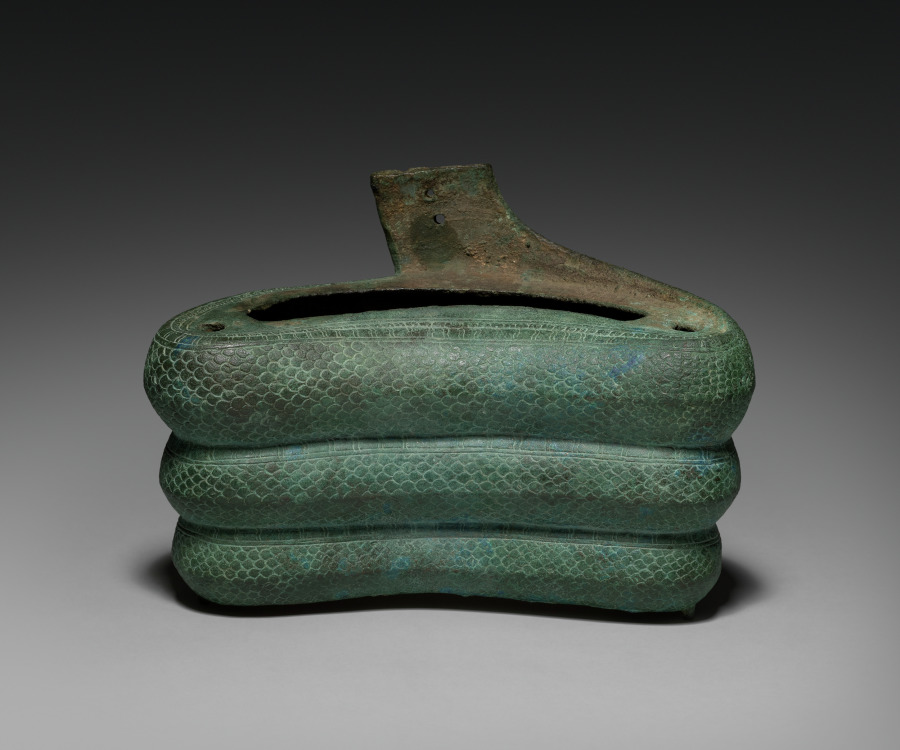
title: Naga-enthroned Buddha (base)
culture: Cambodia, Angkor, Angkor Wat Period, 12th century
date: 1100–1150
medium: bronze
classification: Sculpture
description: Jayavarman VII, who built the great royal temple at Banteay Chhmar, linked himself with the image of the Buddha seated on a serpent, or naga, as the divine form under which he would be honored. During his reign, the naga-enthroned Buddha became a ubiquitous image for veneration, often set up together with Lokeshvara, who was associated with his father, and Prajnaparamita, the form under which his deceased mother was honored. Lokeshvara is the powerful enlightened being of compassion, while Prajnaparmita is the goddess who personifies wisdom. King Jayavarman VII, therefore, presented himself as the enlightened Buddha, the product of the union of Compassion and Wisdom, supported and glorified by the naga, which refers to the Khmer people. Images of the naga-enthroned Buddha have been found at Banteay Chhmar, both in architectural relief sculpture and as icons in the round. After the death of Jayavarman VII, followers of other forms of Buddhism (for example, Theravada) that became prevalent in Cambodia changed the meaning of the naga-enthroned Buddha and reinterpreted the image to refer to a scene from the historical Buddha’s life story in which a serpent protected him from a flood. The crowned and bejeweled aspect of this Buddha, though, indicates that it is another kind of transcendent figure. In his lap his hands are in a posture of meditation, holding what appears to be an offering of ceremonial rice referring to the hope that he will ensure the prosperity of the land.